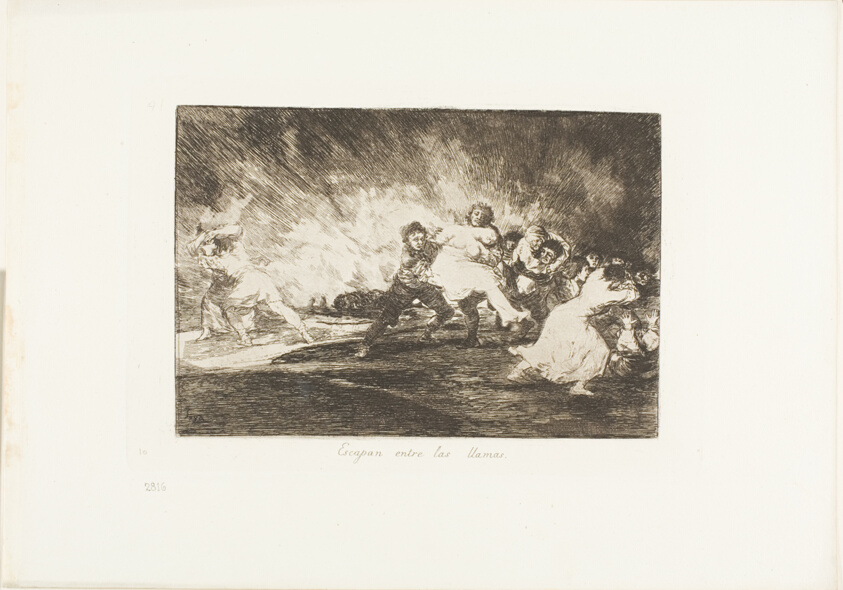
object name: Print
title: They Escape through the Flames, plate 41 from The Disasters of War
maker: Francisco José de Goya y Lucientes (Spanish, 1746-1828)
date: 1810/12, published 1863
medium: Etching and burin on ivory wove paper with gilt edges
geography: Spain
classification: aquatint; print; prints and drawing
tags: war